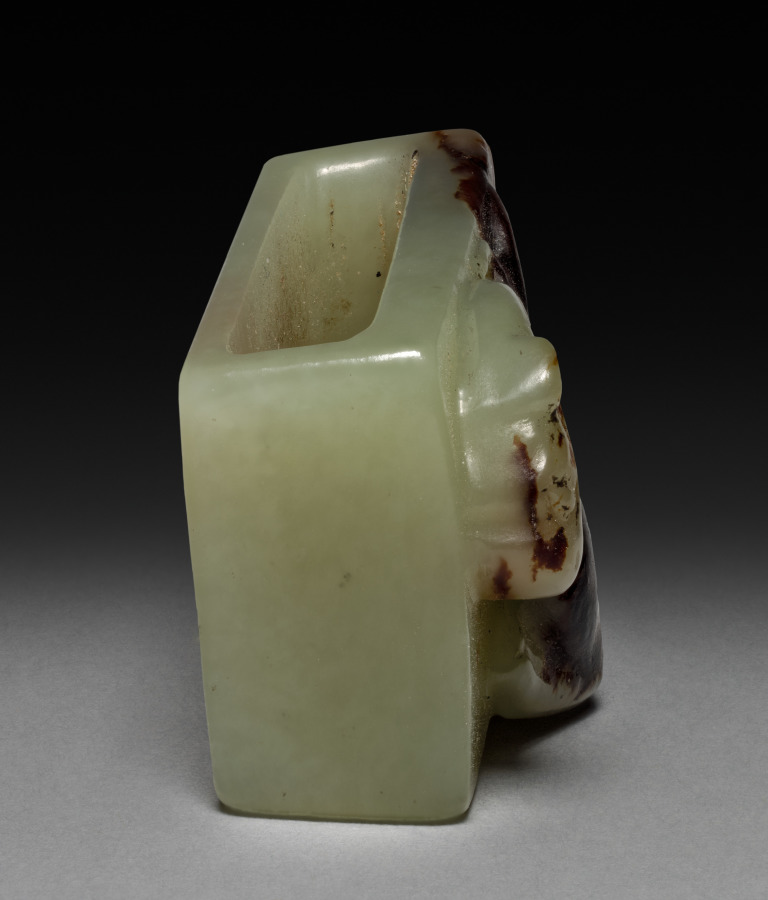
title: Scabbard Fitting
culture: China, Six Dynasties period (220–589 CE)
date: 317–581 CE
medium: jade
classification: Jade